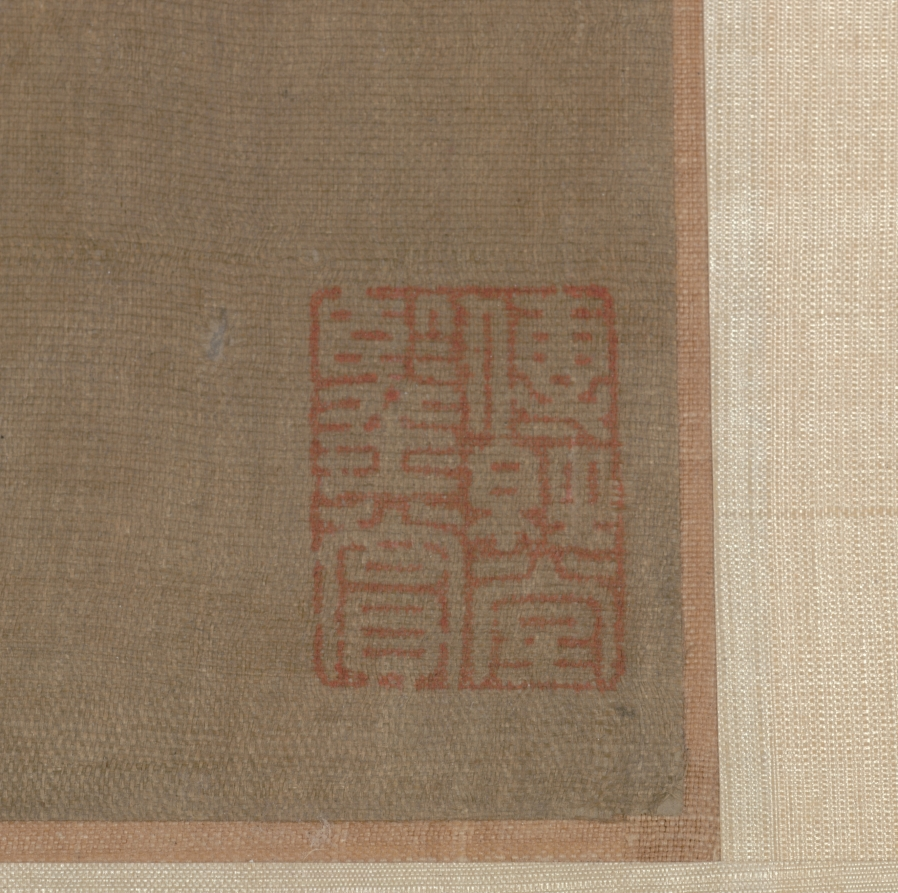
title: Lonely Retreat Overlooking a Misty Valley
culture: China, Ming dynasty (1368–1644)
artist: Sheng Maoye (Chinese, active early 1600s)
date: 1630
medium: hanging scroll; ink and slight color on silk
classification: Painting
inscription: Artist's inscription, signature, and 2 seals: In the tenth month of the gengwu year of the Chongzhen era [1630]. Sheng Maoye [seals] Sheng yin Maoye; Yuhua shi.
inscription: 4 additional seals of Liu Shu (1759–1816)